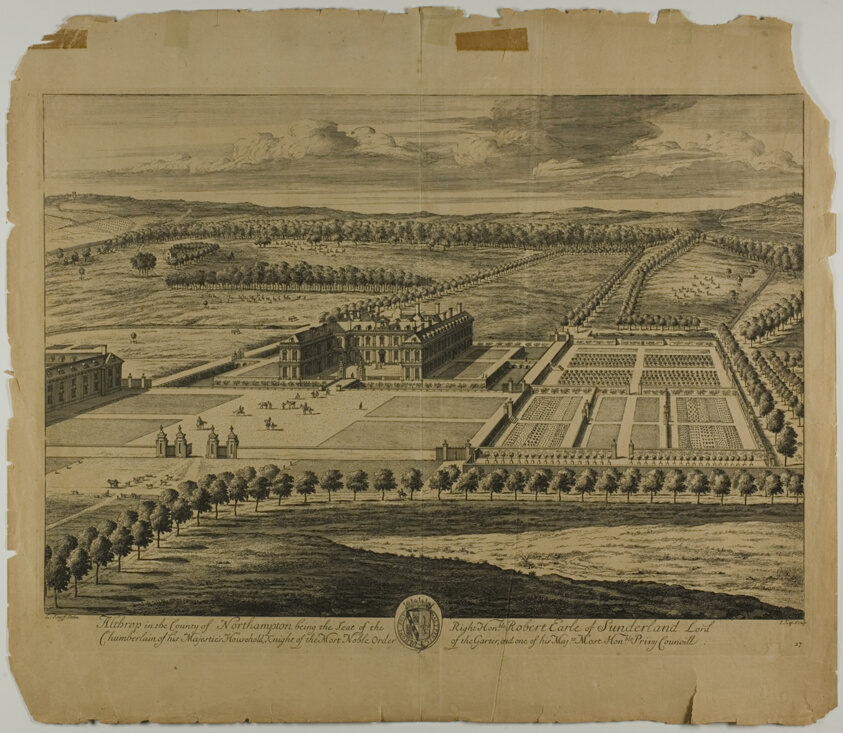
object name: Print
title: Althrop in the County of Northampton, plate 27 from Britannia Illustrata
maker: Jan Kip (Dutch, c. 1653-1722); after Leonard Knyff (Dutch, 1650-1721); published by David Mortier (French, 1673-1728)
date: published 1707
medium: Etching, with engraving, in black on cream laid paper (discolored to buff)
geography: Netherlands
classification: prints and drawing; engraving; etching; print